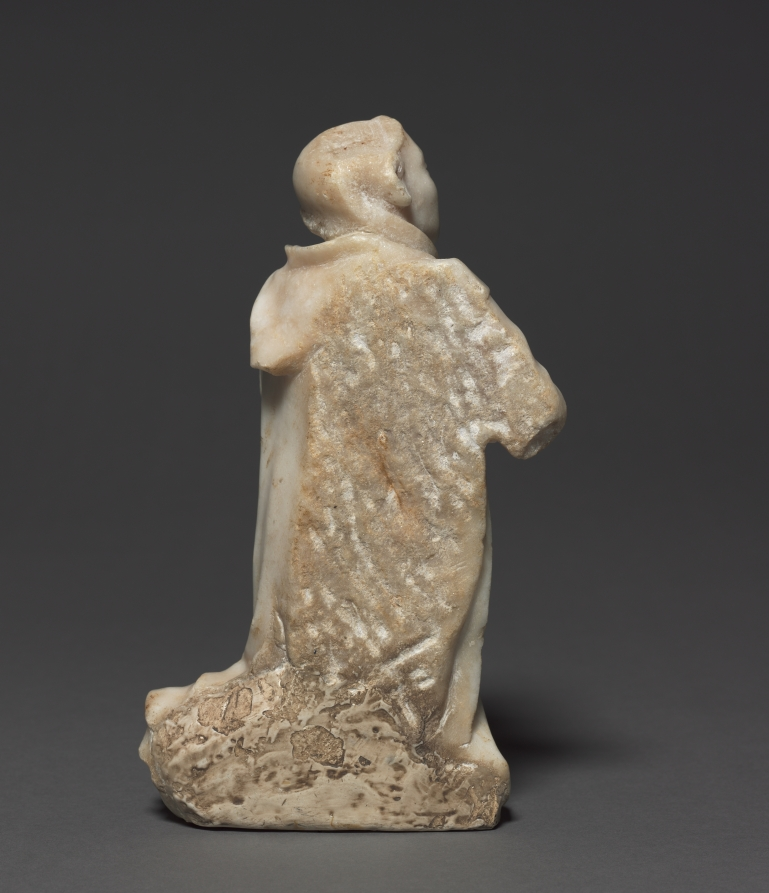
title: Kneeling Carthusian Monk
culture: France, Burgundy, Dijon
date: c. 1380–1400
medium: marble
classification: Sculpture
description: These are the only known surviving sculpted examples of kneeling Carthusian monks. These two figures would have formed part of a private devotional group, probably in a monk’s cell, with a sculpture of the crucified Christ or the Virgin positioned between them. They wear the recognizable white scapular, a hooded garment with front and back panels tied together with a tab.